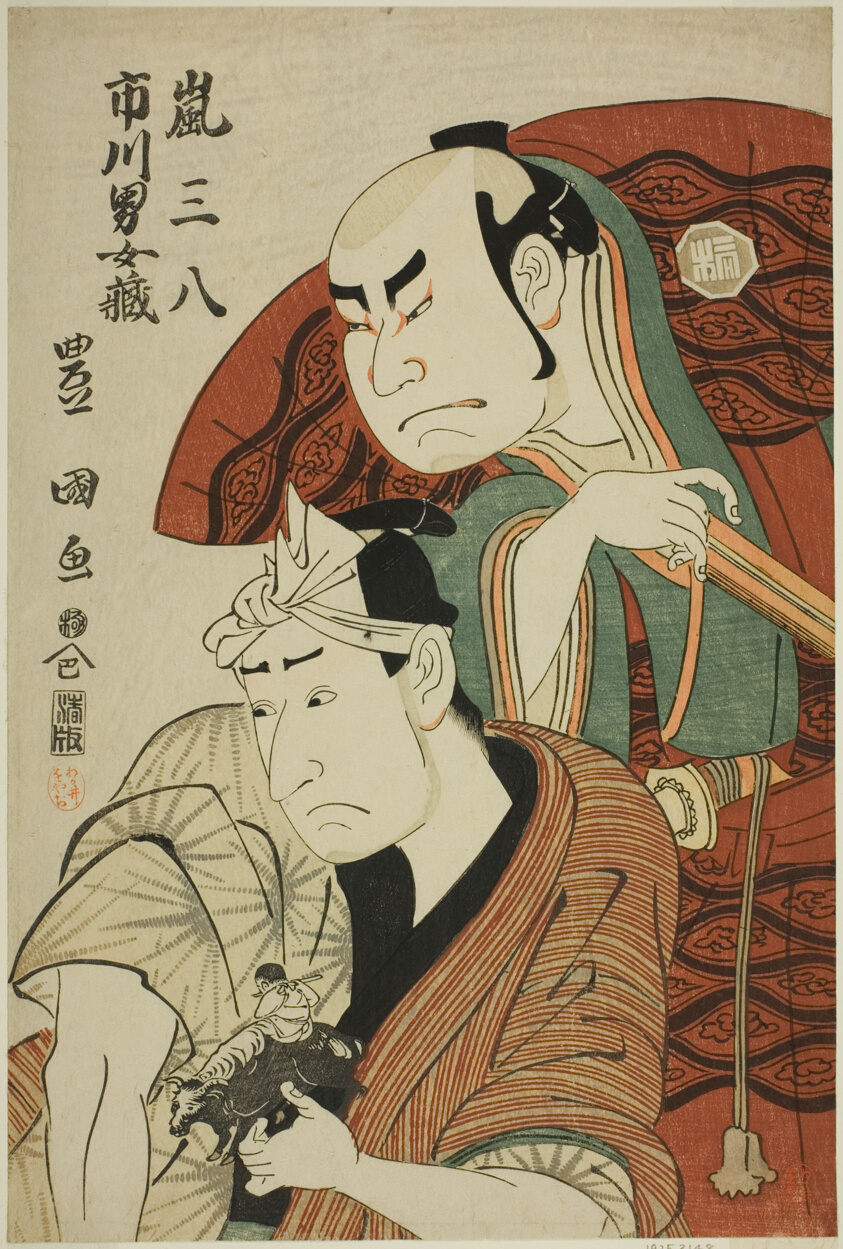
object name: Print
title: The actors Arashi Sanpachi I and Ichikawa Omezo I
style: Japanese (culture or style)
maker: Utagawa Toyokuni I 初代 歌川 豊国; Japanese, 1769–1825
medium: Color woodblock print; oban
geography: Japan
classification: woodblock print; print; asian art